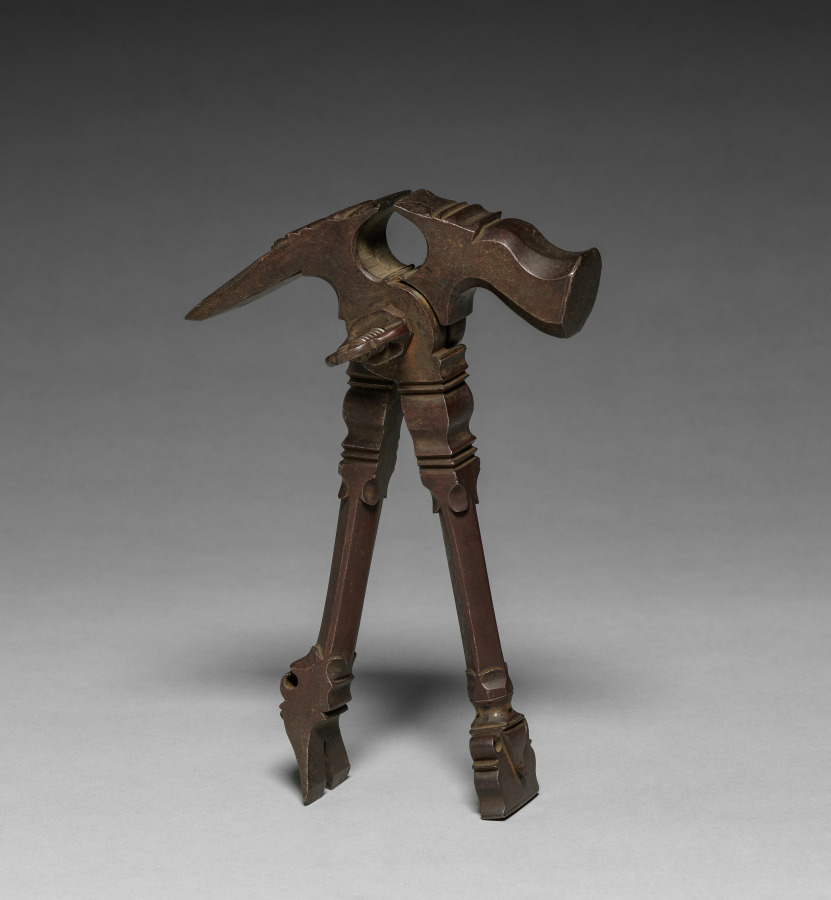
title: Combination Tool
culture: Germany or France, 16th century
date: 1500s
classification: Tool